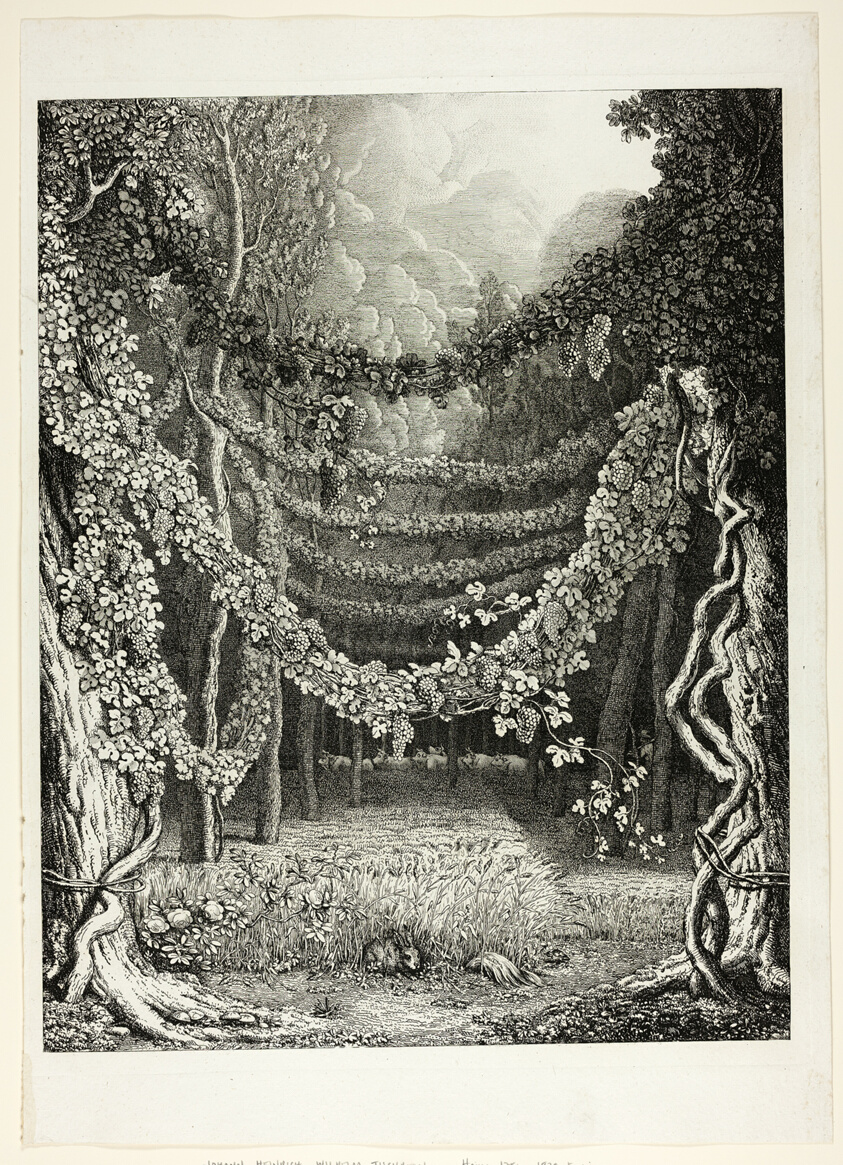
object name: Print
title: Oenotria Telus, An Idealized Woodland Scene Near Naples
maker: Johann Heinrich Wilhelm Tischbein; German, 1751-1829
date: 1796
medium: Etching in black on ivory wove paper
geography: Germany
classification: etching; paper; print; prints and drawing